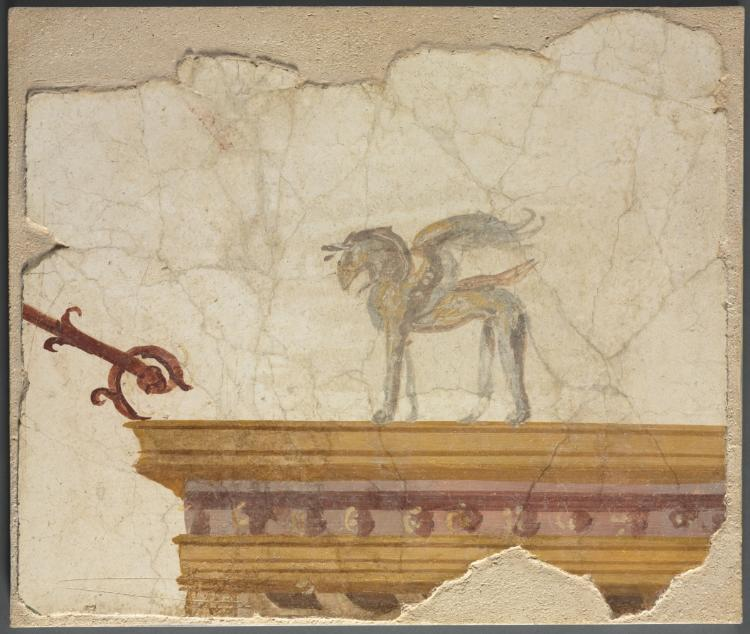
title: Griffin Atop Entablature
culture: Italy, Pompeii, Roman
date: 1–100 CE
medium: fresco fragment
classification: Painting